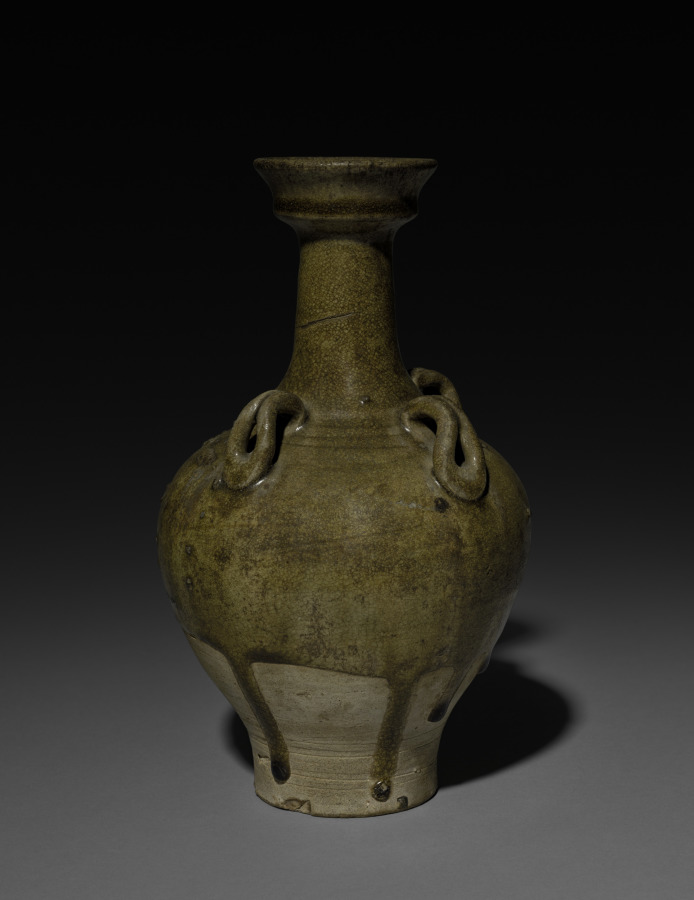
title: Vase with Loop Handles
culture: China, Sui dynasty (581-618)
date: 581–618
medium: glazed stoneware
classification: Ceramic